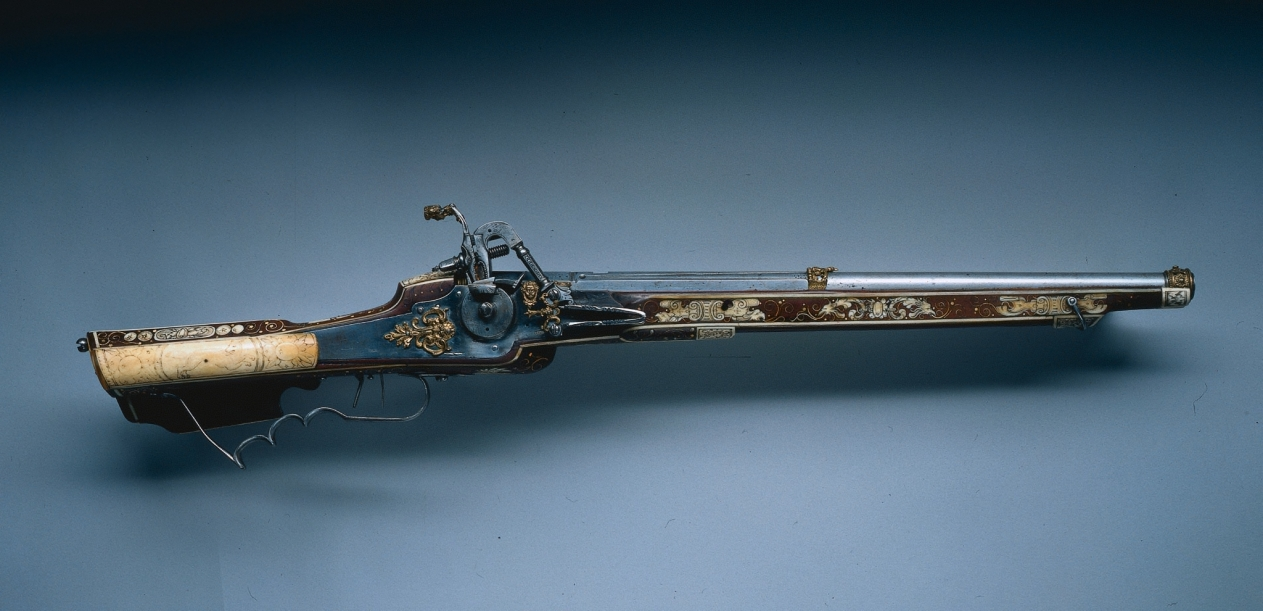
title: Wheel-Lock Rifle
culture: Germany, Bavaria (?), 17th century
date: 1618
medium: steel, brass, walnut stock inlaid with bone, horn and ivory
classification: Arms and Armor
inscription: on barrel: 1618, S.H.; on stock: FF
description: Made originally as a petronel pistol, this firearm seems to have been refitted with a new stock sometime during the 17th century to convert it into a rifle, most likely for a child's use.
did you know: The artisan who made this rifle used brass, bone, horn, and ivory to create decorative elements like animals involved in the hunt, fruits, and other details. If you look beneath the gun, you will see a goose or duck and a vase of flowers near the trigger.